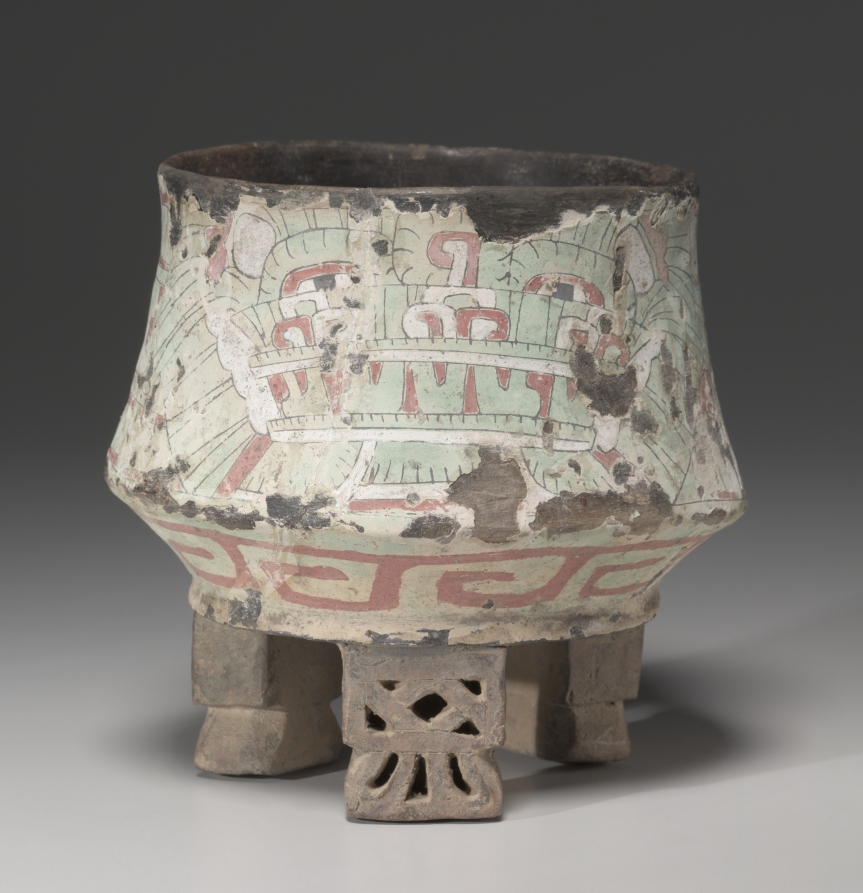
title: Vessel with Butterfly Headdress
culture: Central Mexico, Teotihuacán, Classic period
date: 1–550 CE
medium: ceramic, stucco, pigment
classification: Ceramic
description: The headdress shown on this vessel combines a serpent's mouth with a butterfly's proboscis (feeding tube), which curls between the eyes. The butterfly often appears in the headdress of the Great Goddess, an extremely important Teotihuacán deity. Stucco (paper-thin, painted plaster) is fragile and usually does not survive well; the stucco of the basin in this case has been repaired.